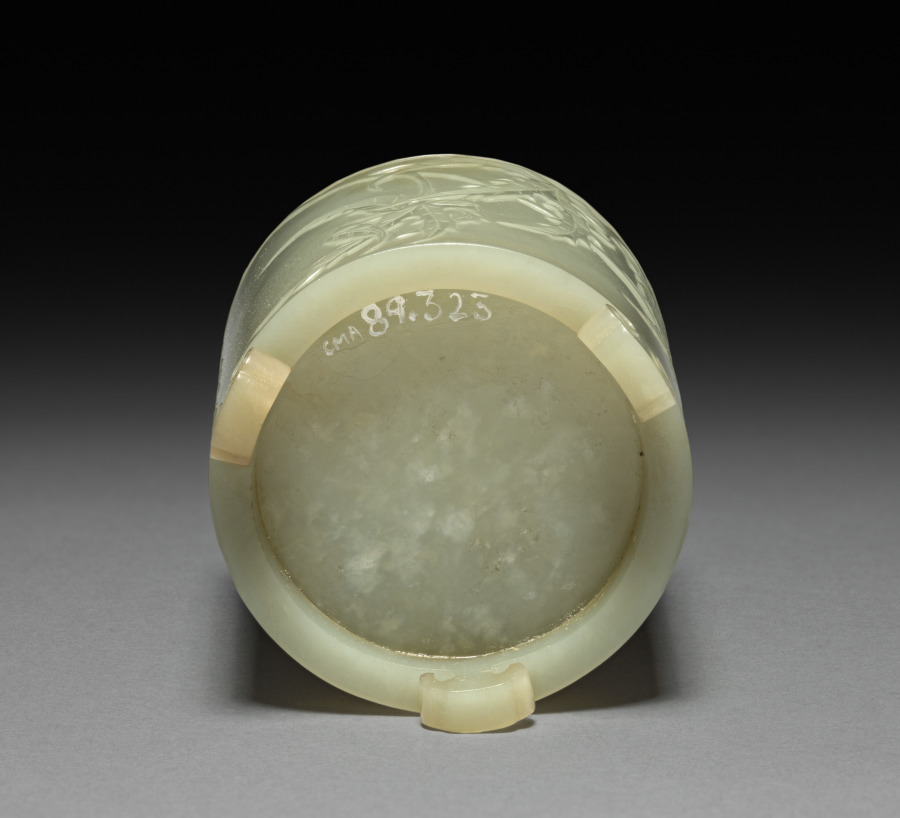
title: Cylindrical Container with Mallows and Inscription in Relief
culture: China, Qing dynasty (1644–1911), Qianlong reign (1736–95)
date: 1736–95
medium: white jade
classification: Jade